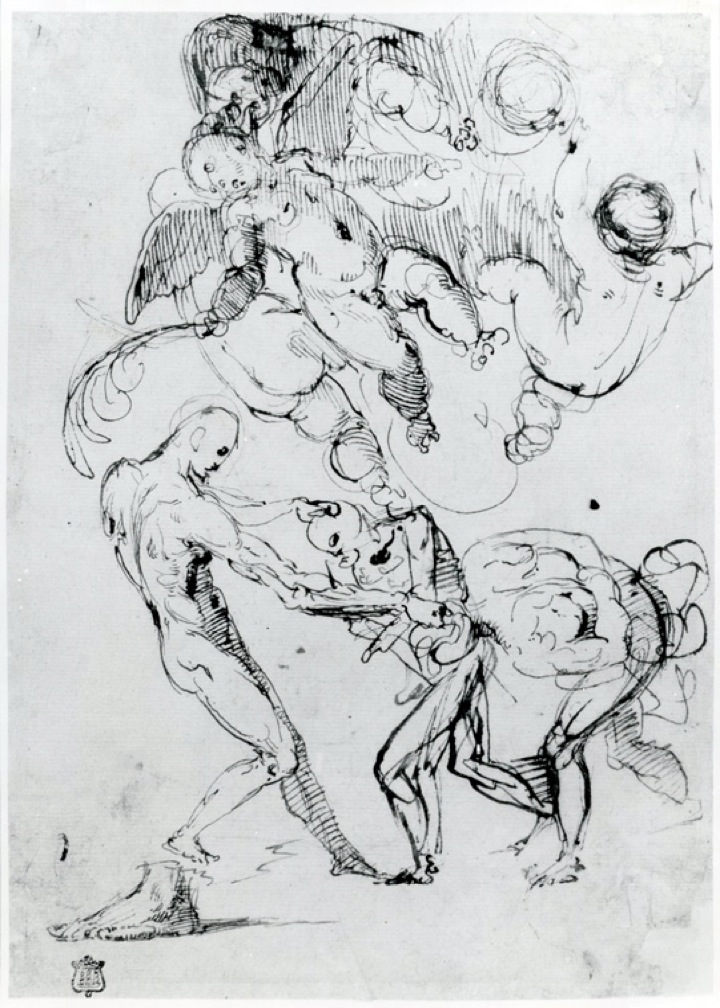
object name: Drawing and Watercolor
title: A Study of Bound Male Figures being Manhandled, and Various Putti, One Holding a Palm Frond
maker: Unknown artist; Italian, late 16th/early 17th century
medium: Pen and brown iron-gall ink on cream laid paper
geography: Italy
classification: drawings (visual works); paper; prints and drawing